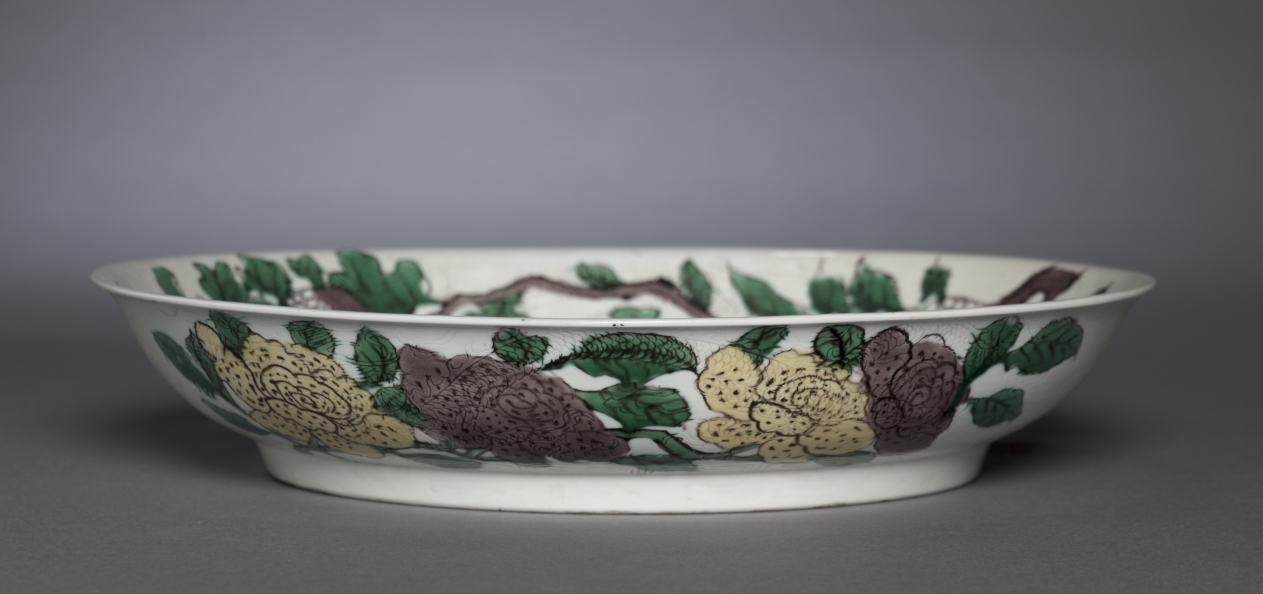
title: Dish with Dragons, Pomegranates, and Peaches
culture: China, Jiangxi province, Jingdezhen, Qing dynasty (1644-1911), Kangxi mark and period (1662-1722)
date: 1662–1722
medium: Porcelain with incised and enamel decoration, susancai ware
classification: Ceramic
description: Various techniques are applied to the decoration of susancai or "plain three-color" ware. The hidden dragons are incised, over which are painted decoration of fruit and flower sprays outlined with black pigment and colored with yellow, green, turquoise, and purplish brown enamels. The ground is filled with ivory enamel over unglazed clay.